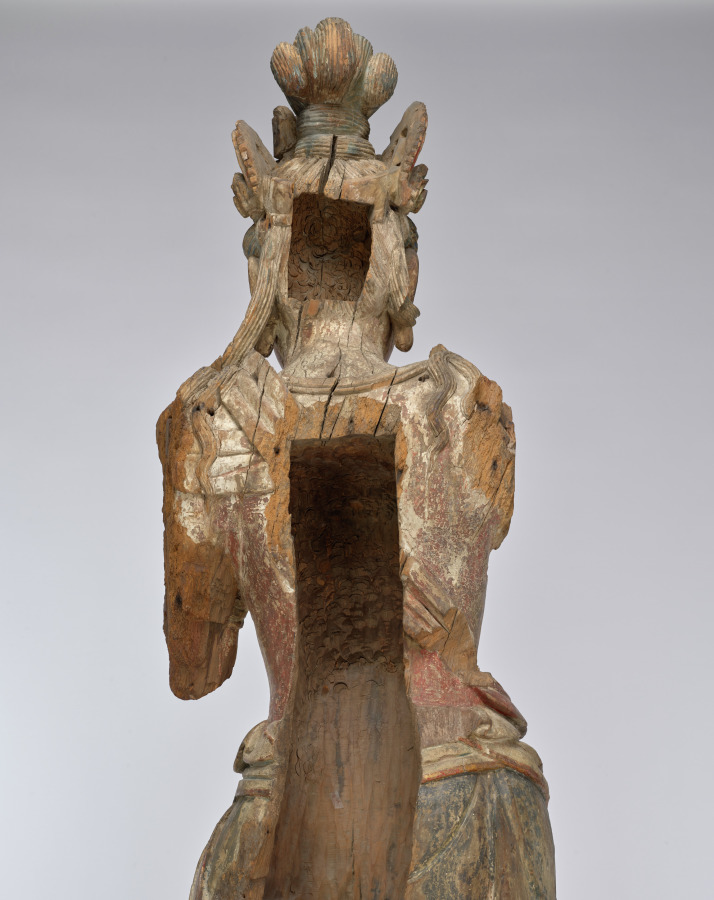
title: Eleven-Headed Guanyin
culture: China, late Northern Song dynasty (960-1127) - Jin dynasty (1115-1234)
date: 1100–1200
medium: wood with polychromy and cut gold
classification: Sculpture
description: The bodhisattva is an enlightened being dedicated to the spiritual awakening of all beings. The compassionate bodhisattva Guanyin, in a variety of manifestations, is probably the most popular deity of worship in Chinese Buddhism. In the Esoteric Buddhist form shown here, this standing Guanyin has a total of eleven heads, with smaller ones above the principal head. The uppermost head represents the Buddha Amitabha, to whom he is closely related. The eleven heads symbolize the Buddha’s steps on the path to enlightenment.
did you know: This Guanyin is carved from a single block of willow (genus Salix sp.).